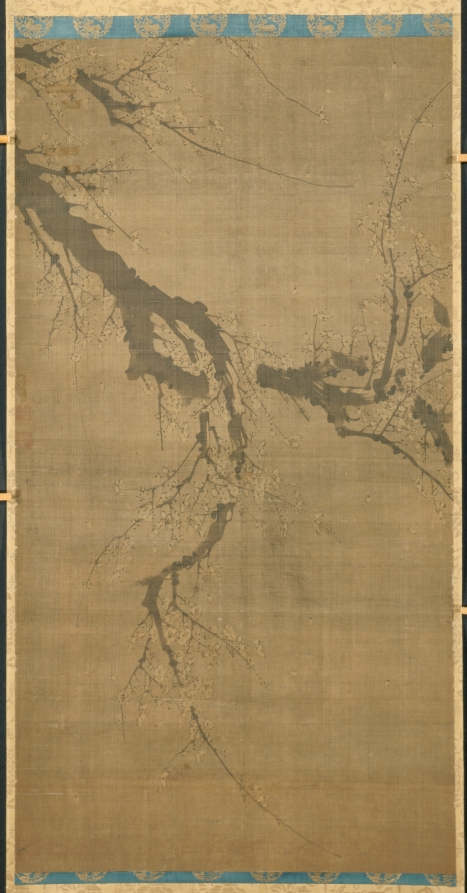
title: Ink Plum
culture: China, Ming dynasty (1368–1644)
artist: Peng Xu (Chinese, active 1488–1521)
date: late 1400s–early 1500s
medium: hanging scroll, ink on silk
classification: Painting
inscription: Artist's 2 seals at left middle edge of painting: Peng shi Te-mien; Shih-chu.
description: Seasonal paintings, including those depicting flowering plum trees in early spring, furnished scholars’ studios or other interior spaces in the house. Peng Xu is considered the foremost follower of the famous plum blossom painter Wang Mian (1287–1359) (see CMA 1974.26). The branches are brushed in the same vigorous manner leaving white streaks in the ink indicating the gnarled bark. The delicate blossoms are drawn in fine lines, while a gray wash covers the entire surface, only leaving the flower petals in reserve.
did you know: Plum trees blossom in the first months of the year; the delicate flowers endure the harsh winter frosts. A popular motif in Chinese ink painting, the plum symbolizes the winter season and is a harbinger of spring.